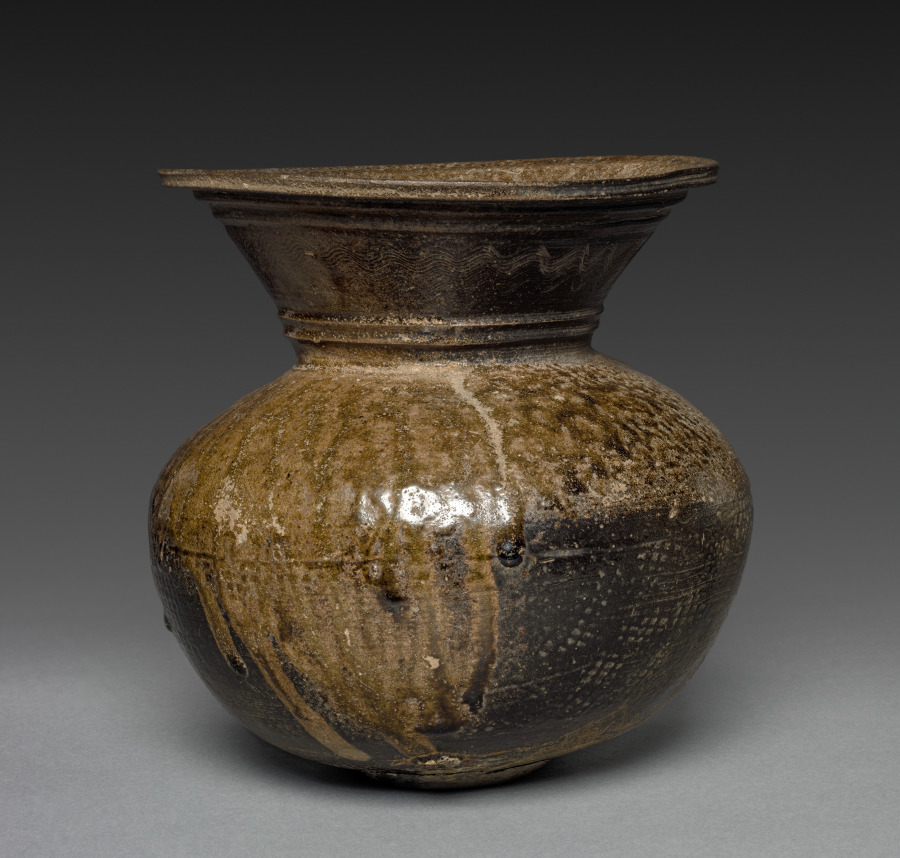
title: Jar with Combed Design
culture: Japan, Kofun period (300–710 CE)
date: 400s–500s CE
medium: stoneware with natural ash glaze, impressed and tooled patterns (Sue ware)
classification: Ceramic